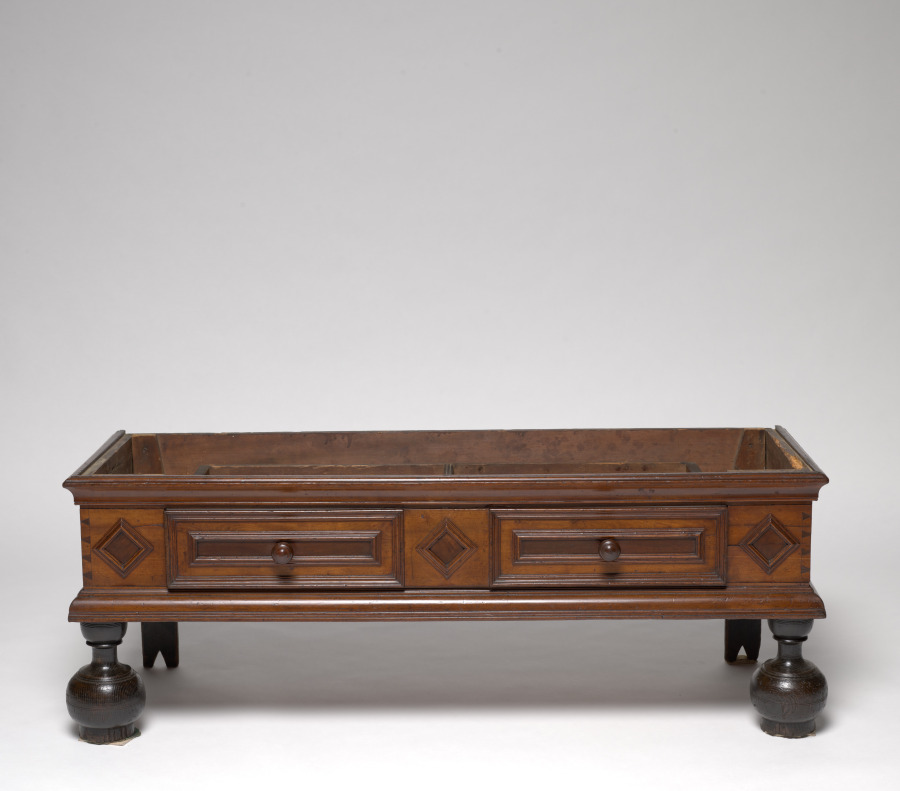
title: Kast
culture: American, King County, NY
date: c. 1710–1740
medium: Various woods, wrought iron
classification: Furniture and woodwork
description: The earliest furniture made in America often shared similarities with works made in the country from where the settlers originated. With its bun feet, paneled surface, and broad projecting cornice, this wardrobe (kast) resembles earlier Dutch examples that come from Amsterdam and its surrounding areas. Therefore, this wardrobe was likely made by the Dutch settlers who colonized New York and New Jersey.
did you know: This Dutch American wardrobe was likely made in a community along the Hudson River in New York by a cabinetmaker who had originally come from the region in or around Amsterdam in Holland.